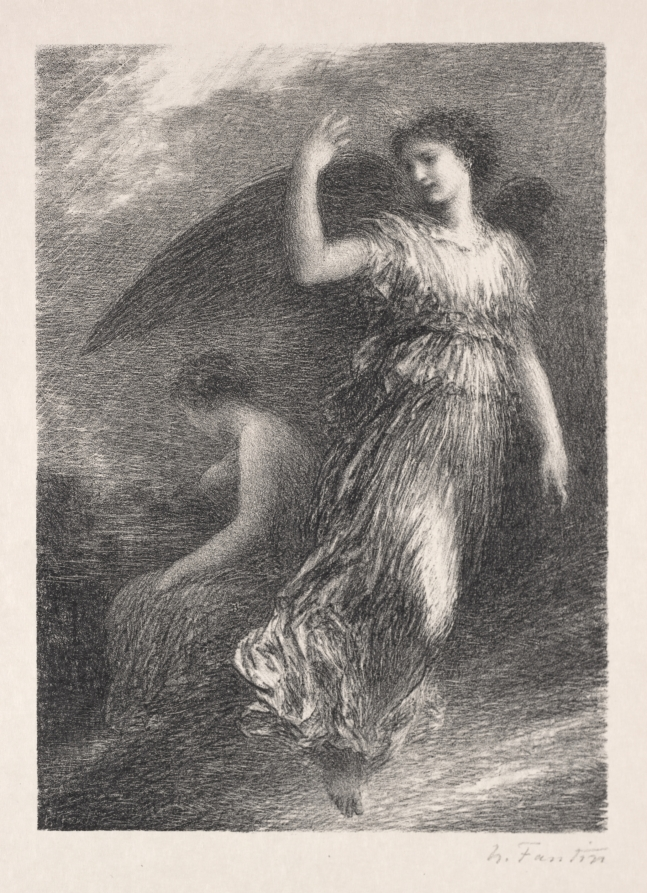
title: Le Paradis et la Peri - Debut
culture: France, early 20th Century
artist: Henri Fantin-Latour (French, 1836–1904)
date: 1901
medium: lithograph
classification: Print